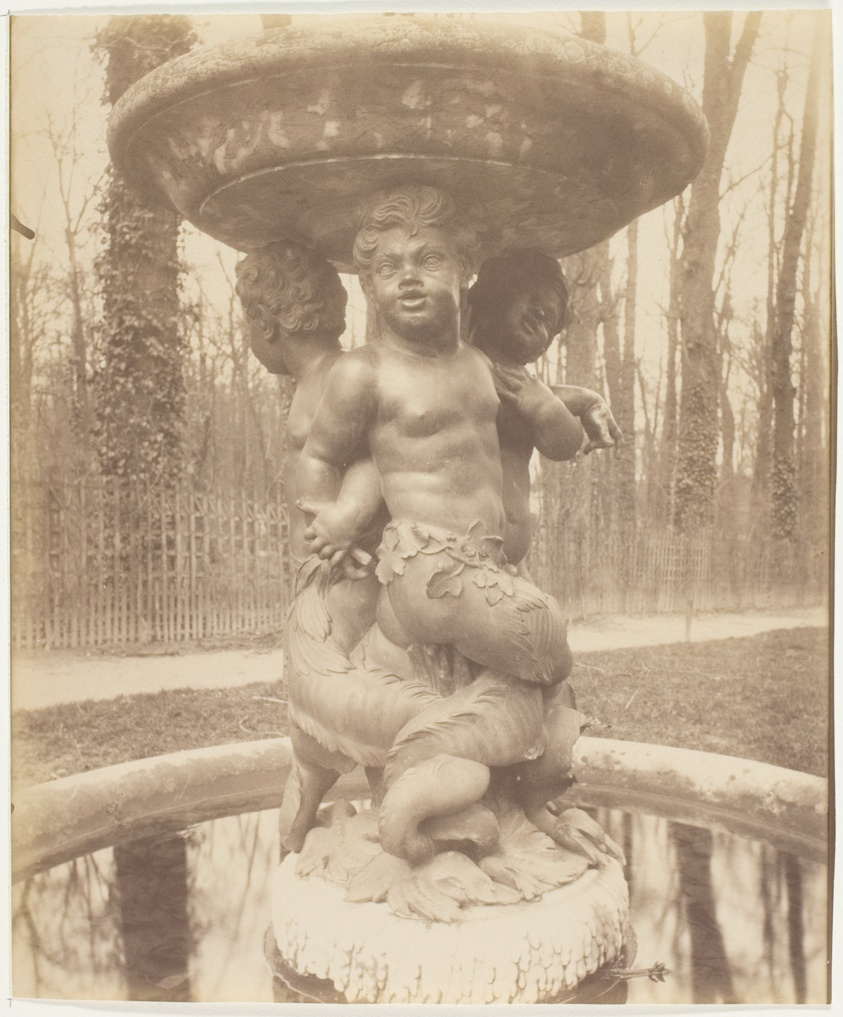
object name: Photograph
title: Versailles, Les Marmousets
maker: Jean-Eugène-Auguste Atget (French, 1857–1927)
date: 1906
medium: Albumen print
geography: France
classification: albumen silver print; photographic process; photography; photograph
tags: Collected by Hugh Edwards